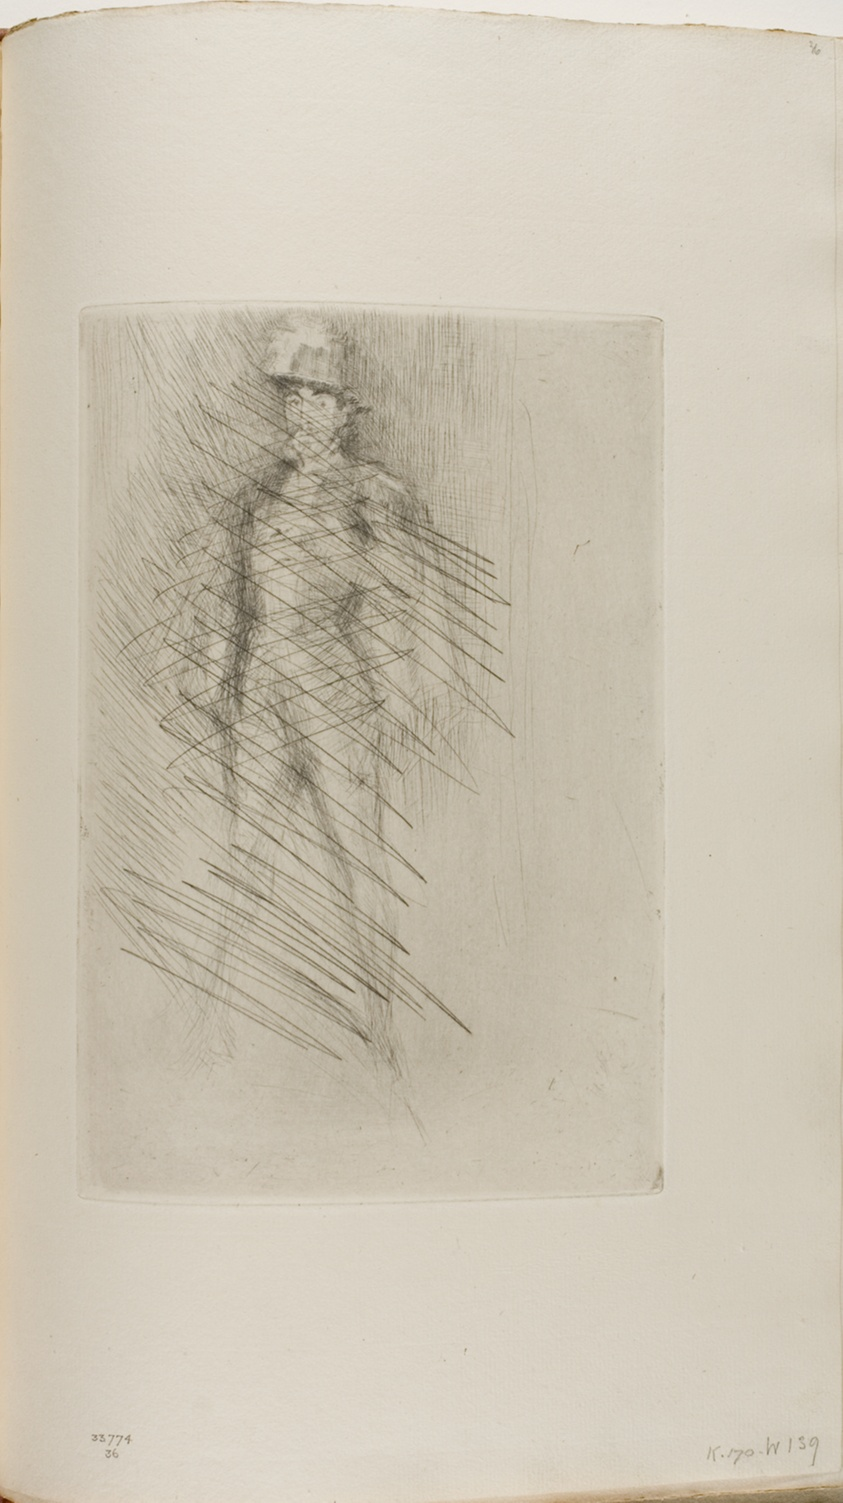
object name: Print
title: Irving as Philip of Spain, No. 2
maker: James McNeill Whistler (American, 1834-1903)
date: 1876/77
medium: Drypoint, with drypoint cancellation, in black ink on ivory laid paper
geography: United States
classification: drypoint; prints and drawing; book; print; paper